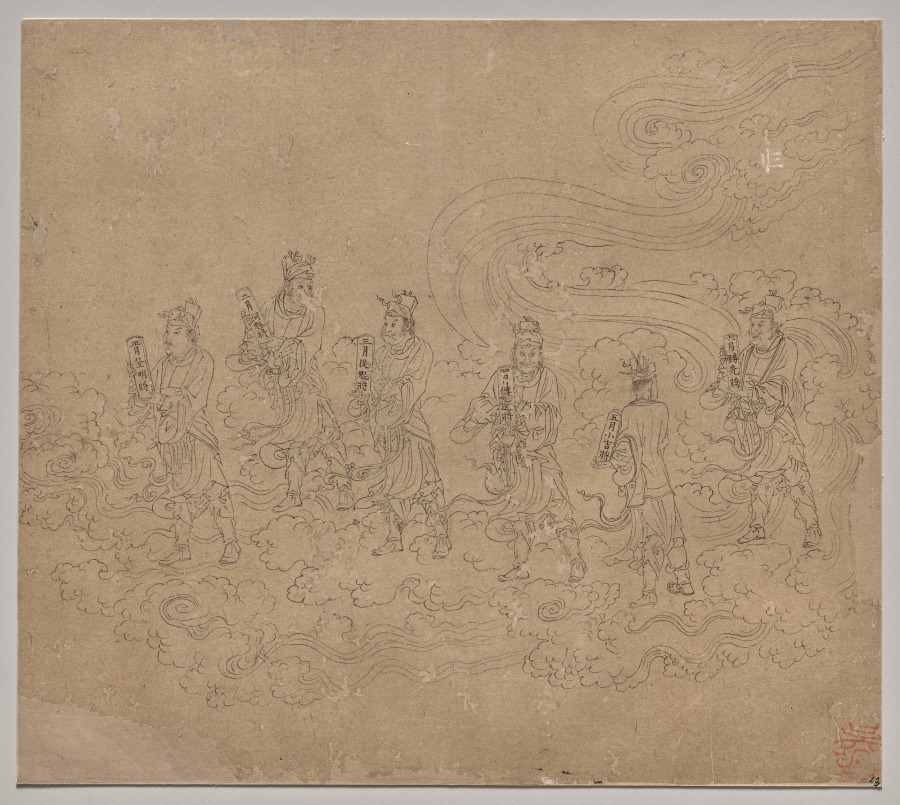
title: Album of Daoist and Buddhist Themes: Procession of Daoist Deities: Leaf 23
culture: China, Southern Song dynasty (1127-1279)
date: 1200s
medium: Album, ink on paper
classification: Painting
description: These six Daoist deities all carry plaques inscribed with their names. This group of six is the first set of half-officers, ranging from the first to the sixth month of the cycle. Album leaf 24 continues the series with the officers for the seventh through the twelfth months.